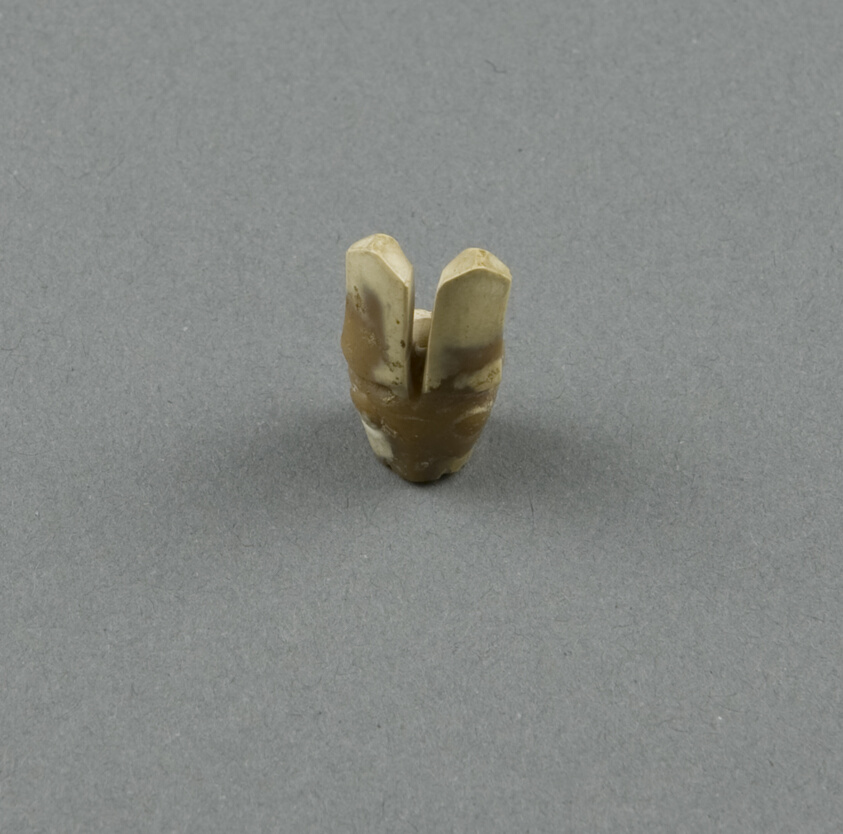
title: Pendant, sheep head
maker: China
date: Shang dynasty (c.1600–1050 BC)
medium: Jade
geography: China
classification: jade; asian art